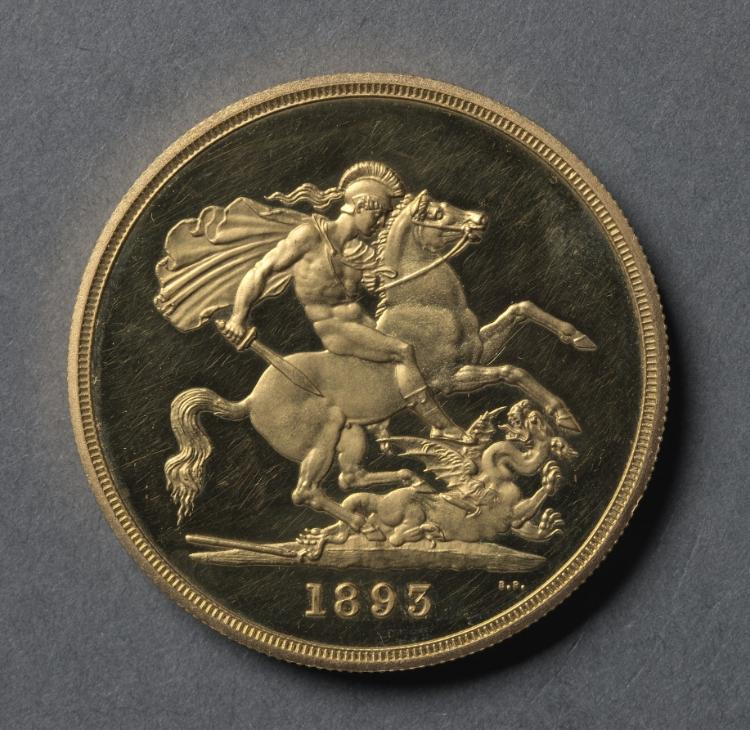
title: Five Pound Piece: St. George and the Dragon (reverse)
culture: England, Victoria, 1837-1901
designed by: after Benedetto Pistrucci (Italian, 1784–1855)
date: 1893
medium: gold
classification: Coins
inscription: below: 1893.